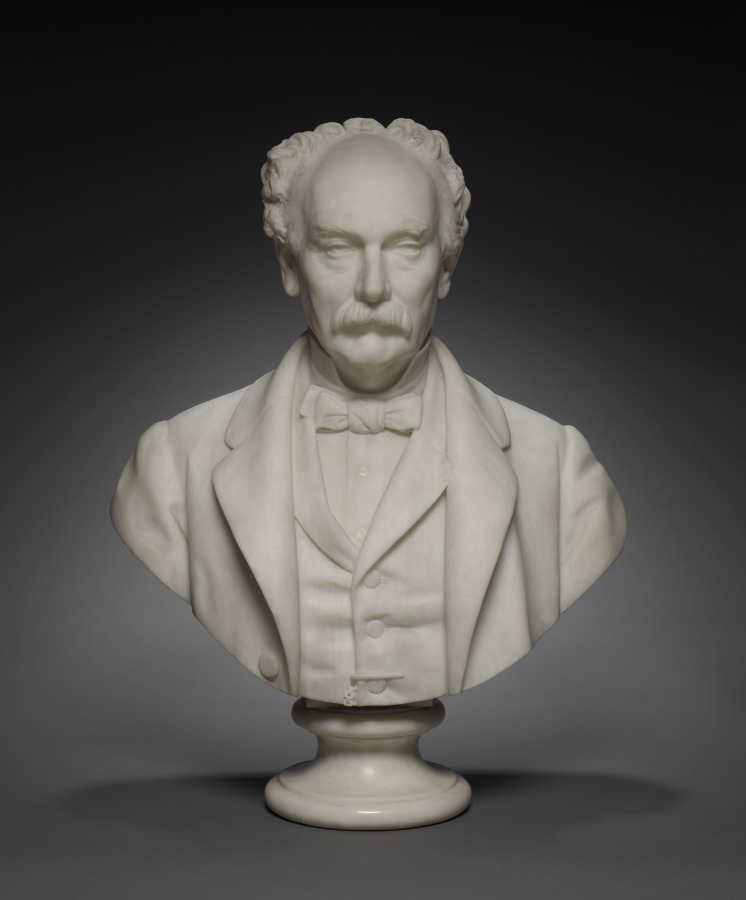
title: Bust of Hinman B. Hurlbut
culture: Italy, Rome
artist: Giovanni Cintselli (Italian, 1832–1883)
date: c. 1870–83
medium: marble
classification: Sculpture